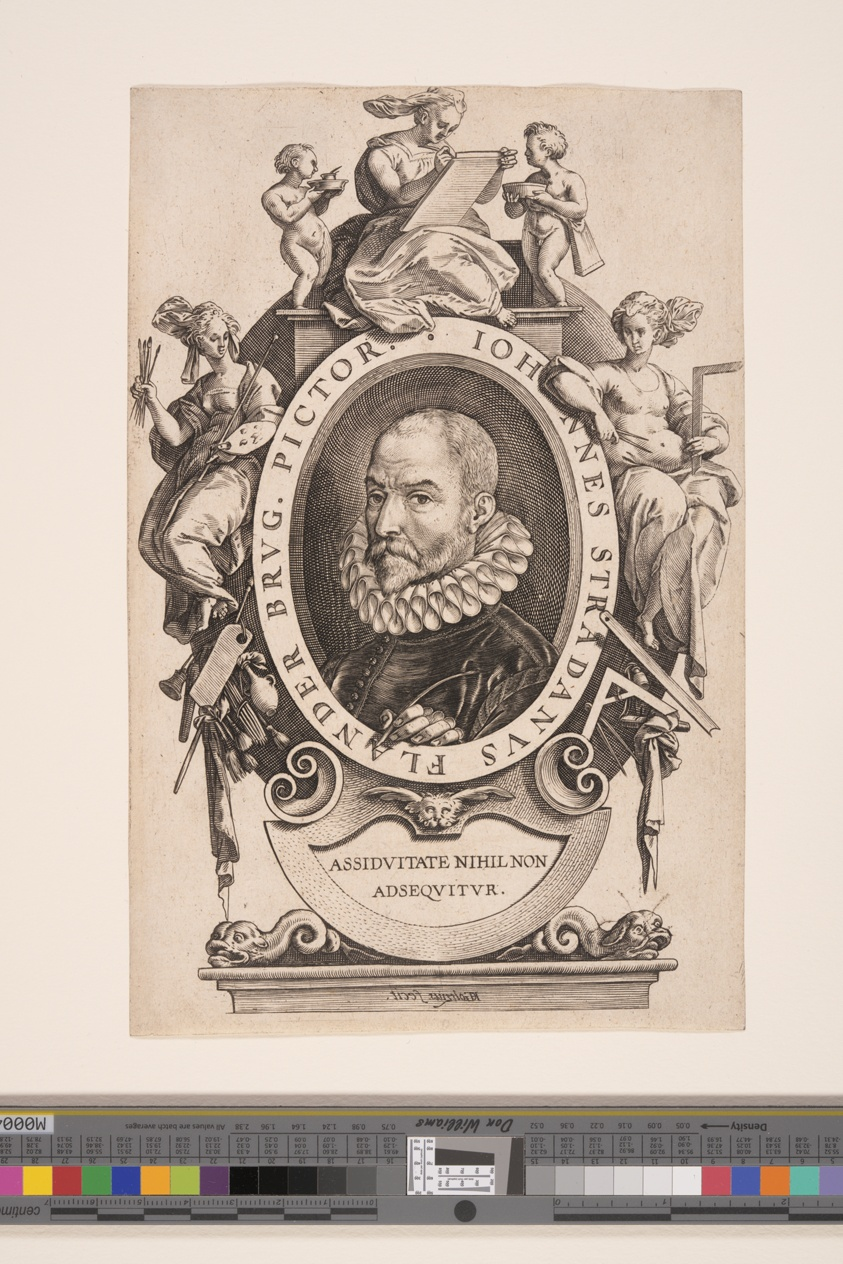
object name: Print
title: Johannes Stradanus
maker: Hendrick Goltzius (Dutch, 1558–1617)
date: 1580/90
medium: Engraving on laid paper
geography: Netherlands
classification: engraving; paper; print; prints and drawing